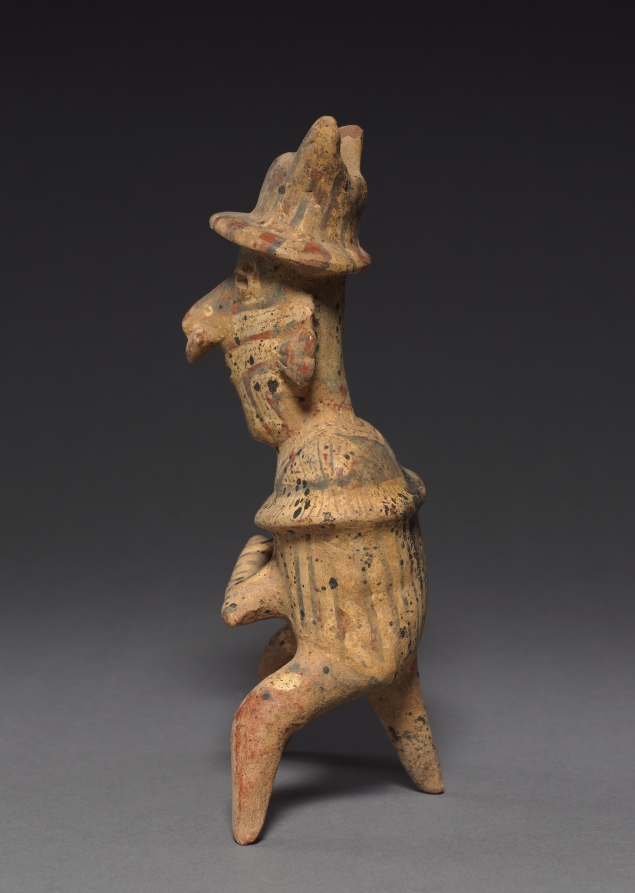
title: Seated Male Holding Chief’s Baton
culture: Mesoamerica, West Mexico, Nayarit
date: 200 BCE–300 CE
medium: ceramic, pigment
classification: Ceramic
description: The ancient artists of West Mexico specialized in ceramic sculptures in a range of sizes, investing their creations with a warm humanity regardless of scale. This tripod-shaped figure represents a well-dressed chief holding a baton of authority.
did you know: This tripod-shaped figure represents a well-dressed chief holding a baton of authority.